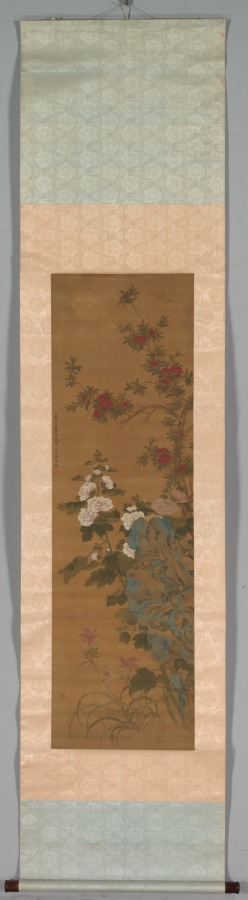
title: Flowers and Rocks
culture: China, Ming dynasty (1368–1644)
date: 1368–1644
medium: hanging scroll, color on silk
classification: Painting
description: Here, the painter uses delicate brushwork and vivid colors to depict an early summer scene of three kinds of flowers growing beside a garden rock: From top to bottom we see flowering pomegranate, then peonies, and lilies below. Like the peony, which conveys wishes for wealth and prosperity, the pomegranate flower, here in festive red color turning soon into fruit with many seeds, is associated with the wish for many sons. The lily, in Chinese "baihe," is a homophone with the pun "togetherness for a hundred years," expressing wishes for harmony and unity. The scroll would have made a suitable gift to married women.